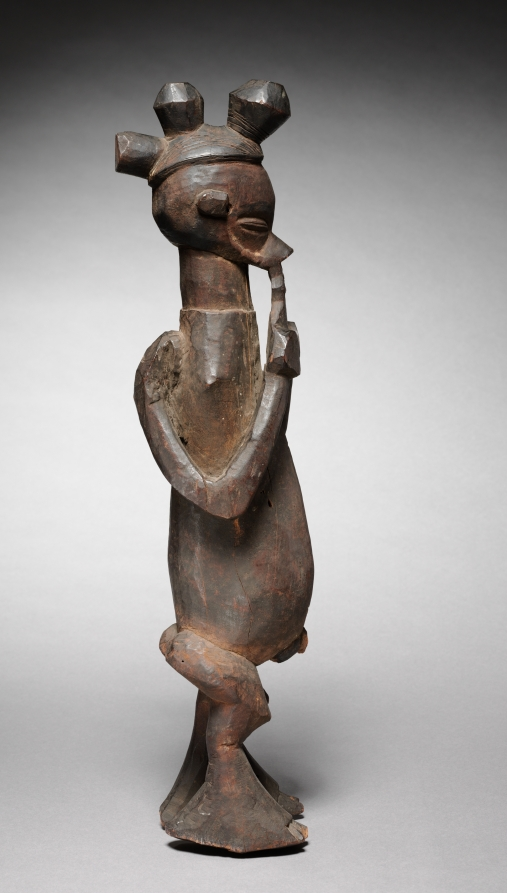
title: Male Figure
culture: Africa, Central Africa, Democratic Republic of the Congo, Yaka-style maker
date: 1900s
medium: wood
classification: Sculpture